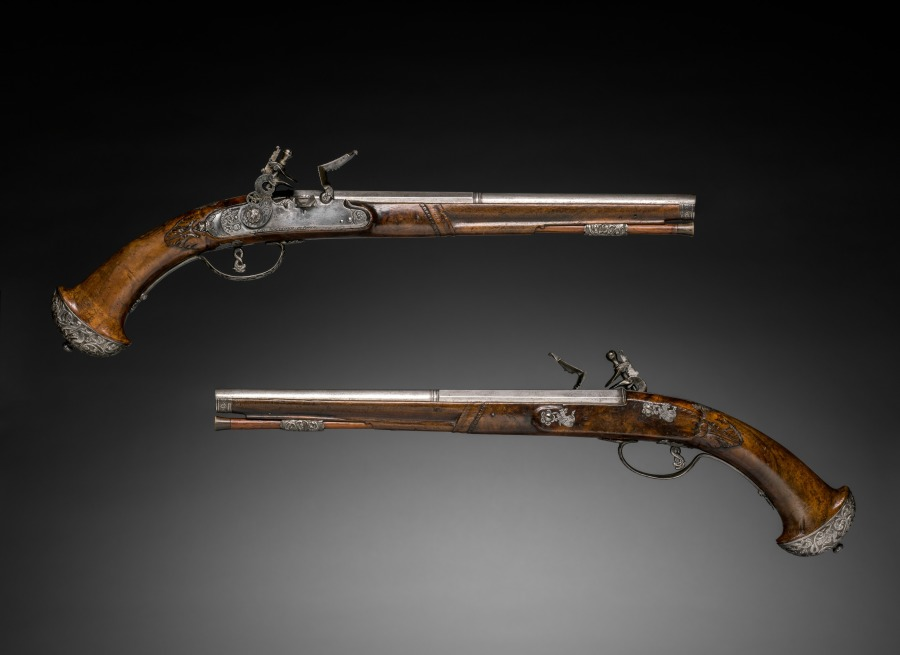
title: Pair of Flintlock Pistols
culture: Italy, Brescia, late 17th century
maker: Gio Borgognone (Italian)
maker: Lazarino Cominazzo (Italian)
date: c. 1690–1700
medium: steel, chiseled steel with walnut stock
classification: Arms and Armor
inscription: barrel signed: Lazarino Cominazzo; lockplates signed: Gio Borgognone in Bresia